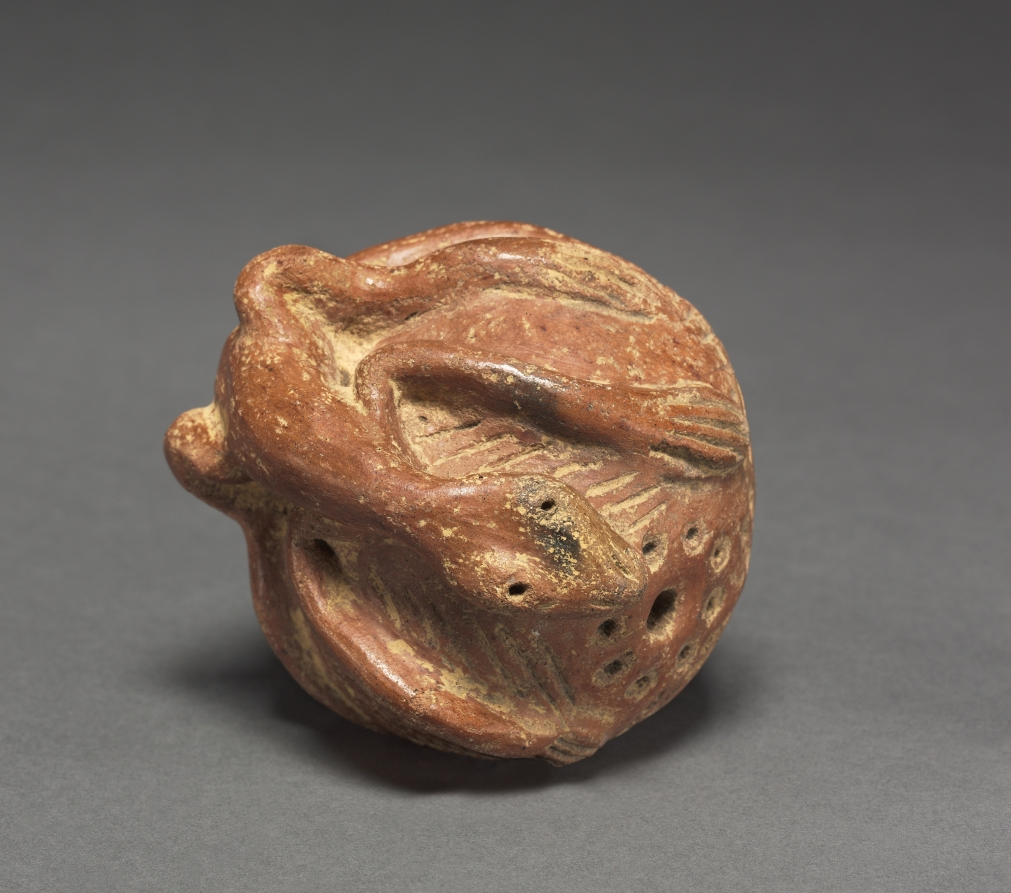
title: Chameleon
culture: Colombia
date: before 1921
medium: red ware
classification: Ceramic